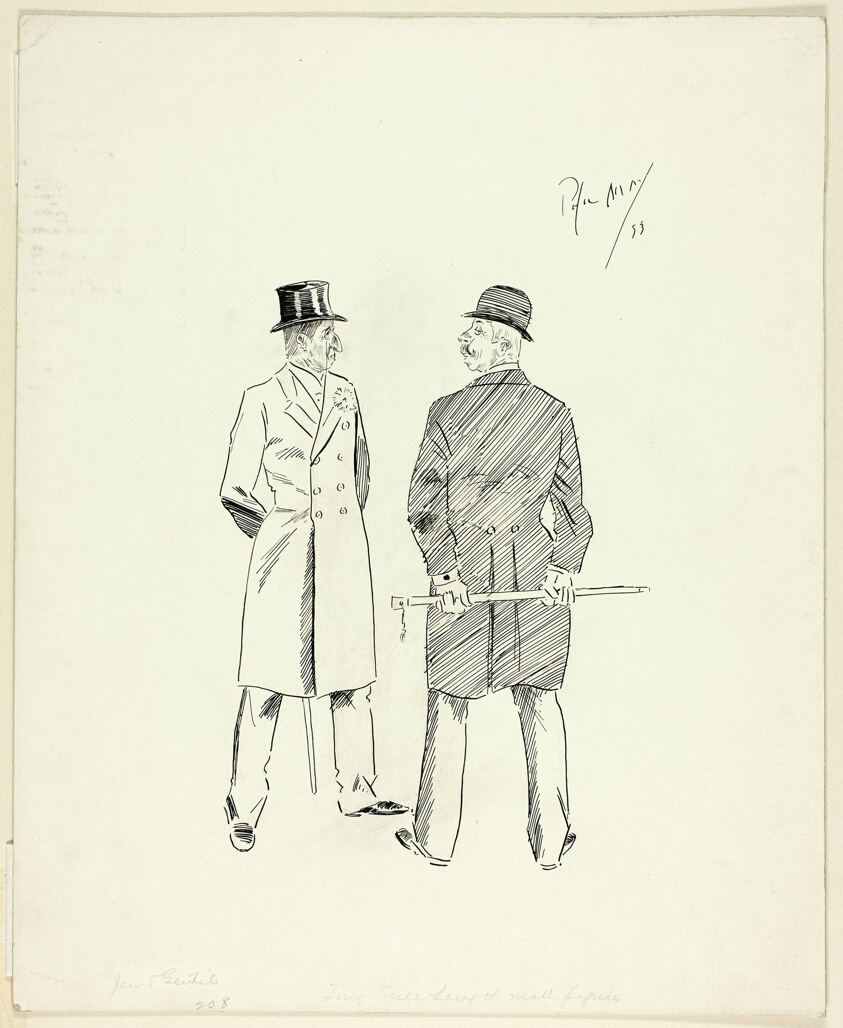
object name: Drawing and Watercolor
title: Two Gentlemen with Walking Sticks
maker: Philipp William May; English, 1864-1903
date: 1893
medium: Pen and black ink over traces of graphite on ivory wove paper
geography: England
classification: pen and ink drawings; drawings (visual works); prints and drawing